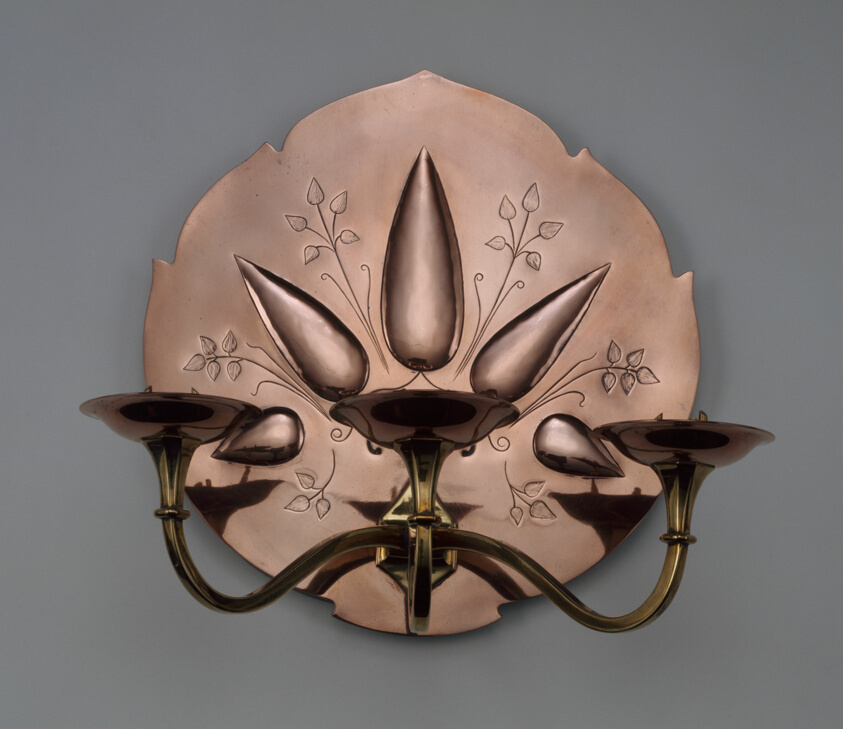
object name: Metalwork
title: Wall Sconce (One of a Pair)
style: Arts and Crafts Movement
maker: Designed by William Arthur Smith Benson (English, 1854-1924); Made by W. A .S. Benson & Co. (England, 1880-1920); England, London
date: 1880/1900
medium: Copper and brass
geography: England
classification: candleholder - sconce; lighting device; furniture; european decorative arts; metalwork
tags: furniture